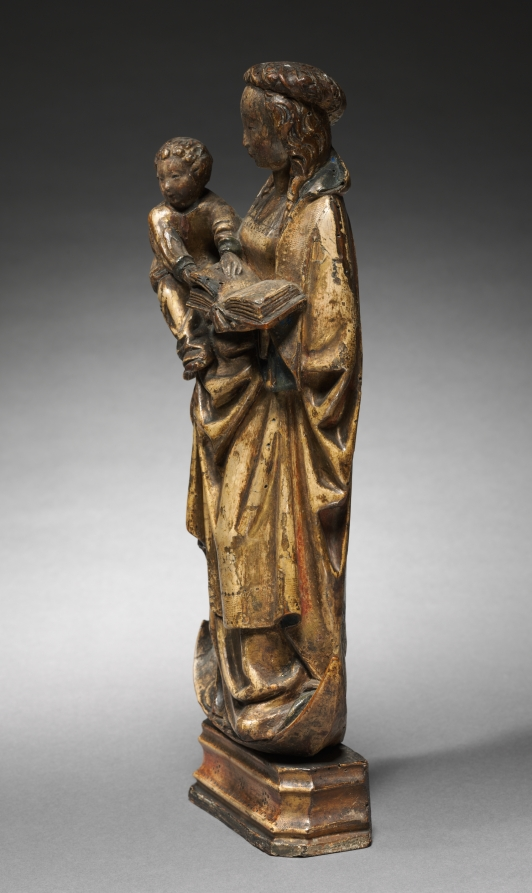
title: Virgin and Child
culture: South Netherlands, Malines, 16th century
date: c. 1510–1515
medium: painted and gilded walnut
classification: Sculpture